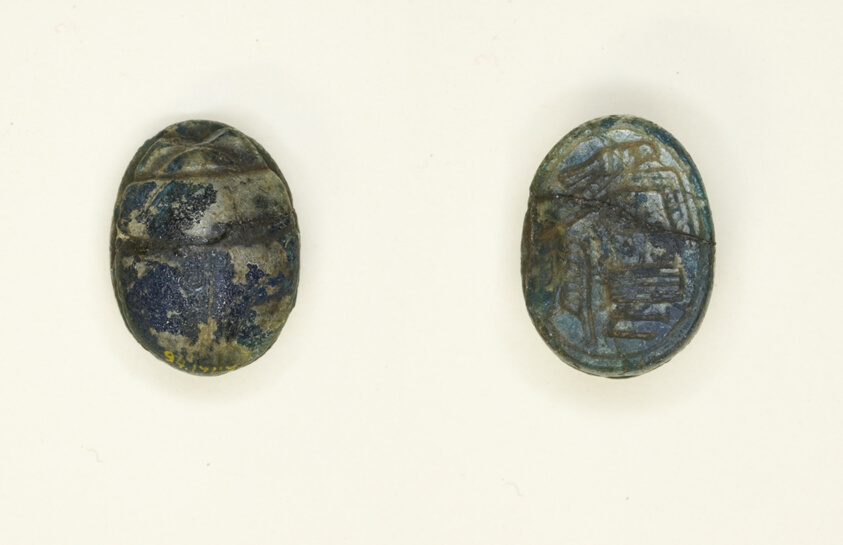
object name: Costume and Accessories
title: Scarab: Hovering Falcon over Name of God Amun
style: new kingdom, ancient, egyptian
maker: Egyptian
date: New Kingdom, Dynasties 18–20 (about 1550–1069 BCE)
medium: Glazed steatite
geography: Egypt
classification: scarab; glass; ancient art; costume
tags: scarab beetle, Hieroglyphs, gods (deities), falcons, deities